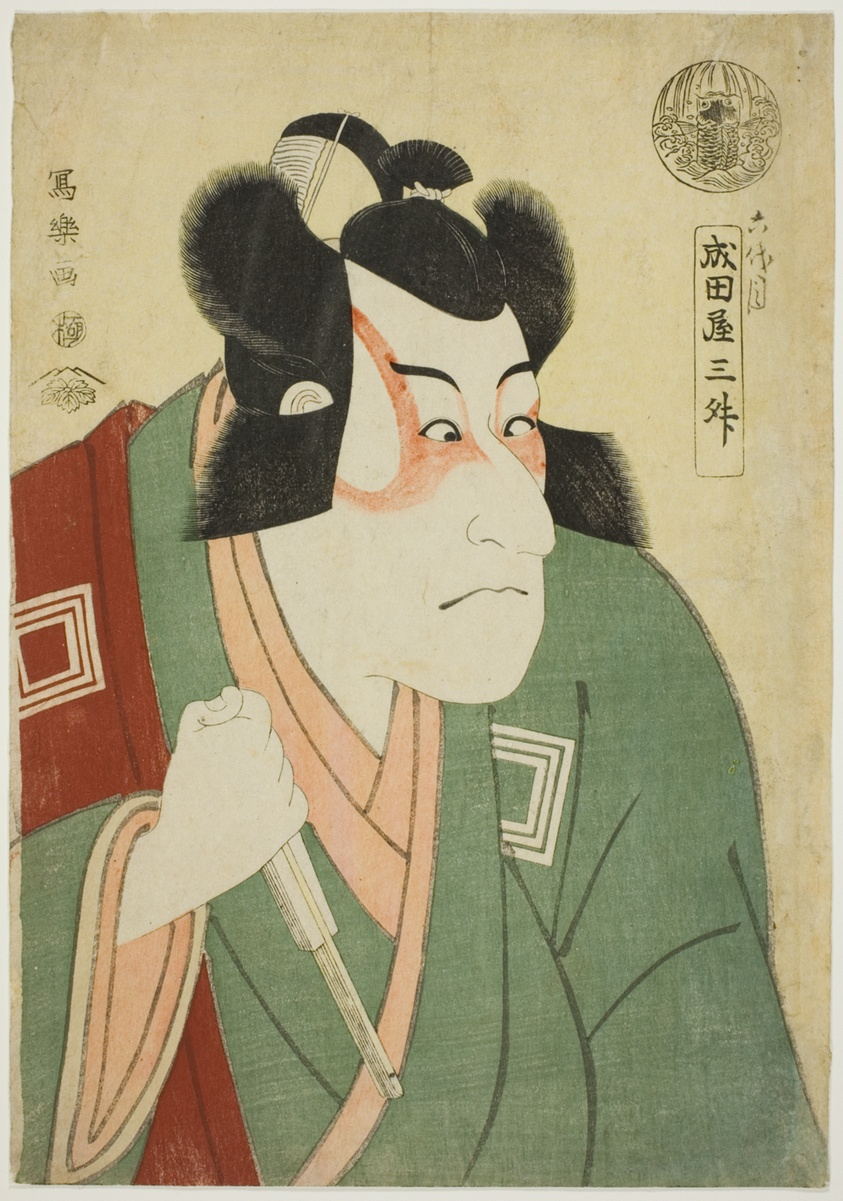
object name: Print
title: Naritaya Sansho (The actor Ichikawa Danjuro VI as Arakawa Taro Takesada)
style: Japanese (culture or style)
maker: Toshusai Sharaku 東洲斎 写楽; Japanese, active 1794-95; Publisher: Tsuta-Ya Juzaburo; Japanese, 1748-1797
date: 1794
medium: Color woodblock print; aiban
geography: Japan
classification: woodblock print; print; asian art